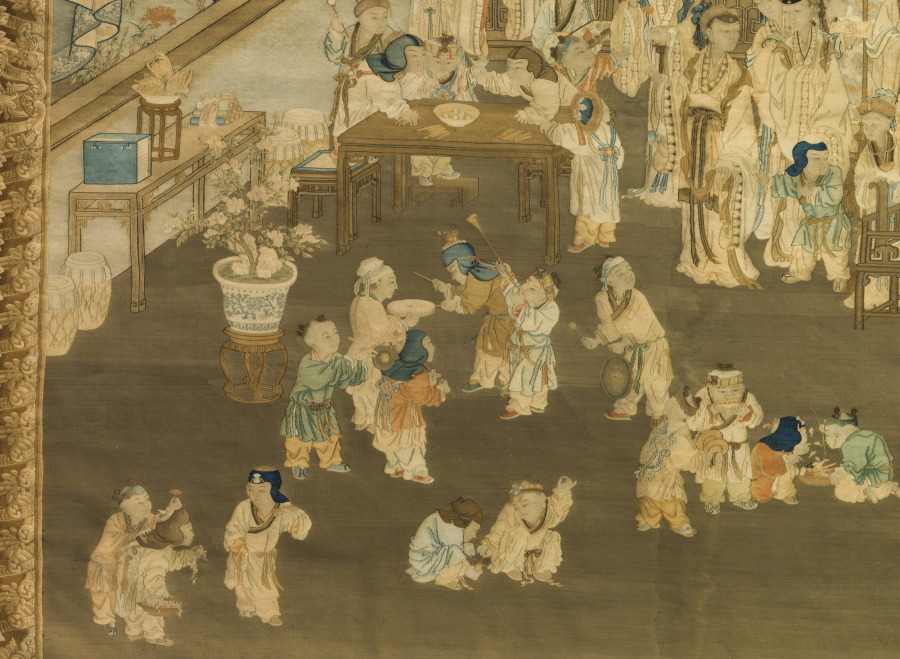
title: Family Gathering on New Year's Morning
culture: China, Qing dynasty (1644-1911)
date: late 1760s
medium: Silk and wool: tapestry weave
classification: Tapestry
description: This European-style tapestry depicts a family gathering, in a woven Western picture frame, that presumably once furnished the Hall of Cultivating the Mind (Yangxin dian) in the Forbidden City. The tapestry employs Western perspective and shading combined with the traditional Chinese subject of a family gathering in a palace, including motifs expressing wishes for good fortune and for a peaceful reign. In 1766, six French tapestries had been presented to the Chinese court. The Qianlong emperor was so intrigued that he commissioned tapestries in the French style from Suzhou. Records mention an imperial order for tapestries in the Western style, such as this one, in 1769, 1770, and 1775.